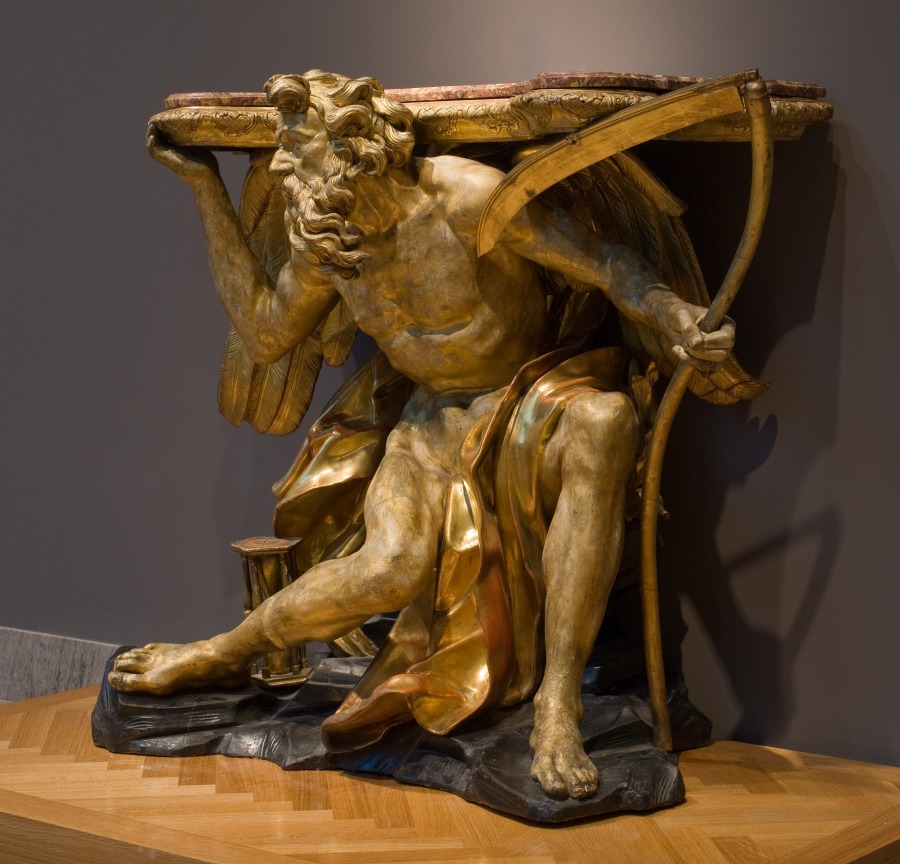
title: Console Table Depicting Chronos, or Father Time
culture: Italy, probably Rome, late 17th-early 18th Century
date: c. 1700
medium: painted and gilded wood, marble top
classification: Furniture and woodwork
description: The marble tabletop is supported by a gilded wooden figure of Father Time (or “Chronos”) adorned with his typical attributes of wings, a scythe, and an hourglass. The metaphorical weight of his eternal role is emphasized as he bears the heavy stone slab on his shoulders while reaching up to ensure its balance.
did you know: Father Time’s scythe symbolizes natural cycles, like the harvest, and time's unstoppable flow that cuts down all living things.